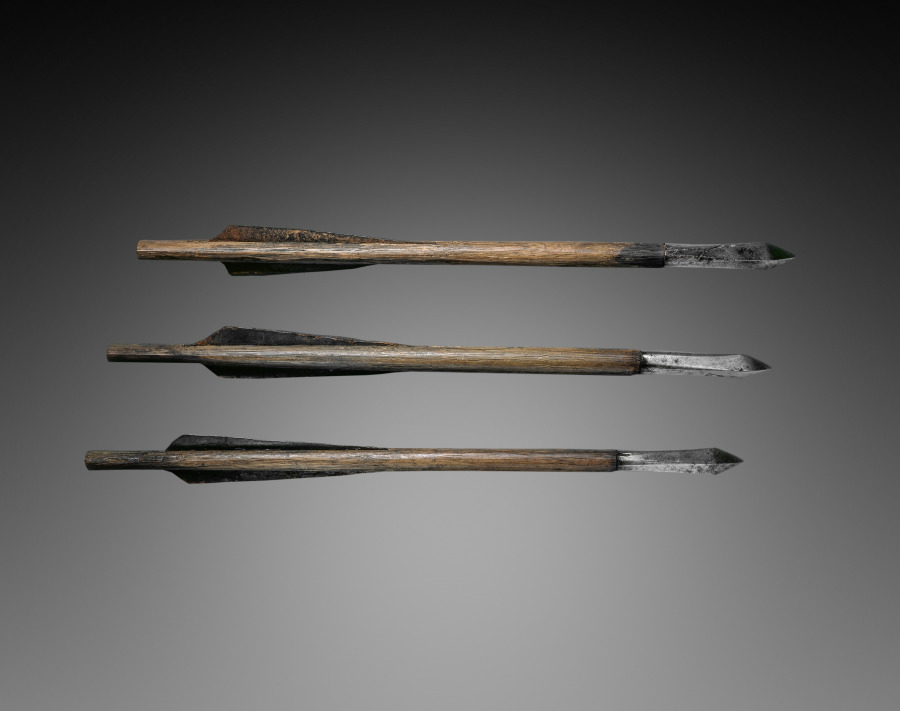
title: Crossbow Bolt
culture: Germany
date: 1500s–1600s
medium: wood, leather, steel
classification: Arms and Armor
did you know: Bolts with leather feathering were used mainly in the Tyrolean area, which includes northern Italy and western Austria.